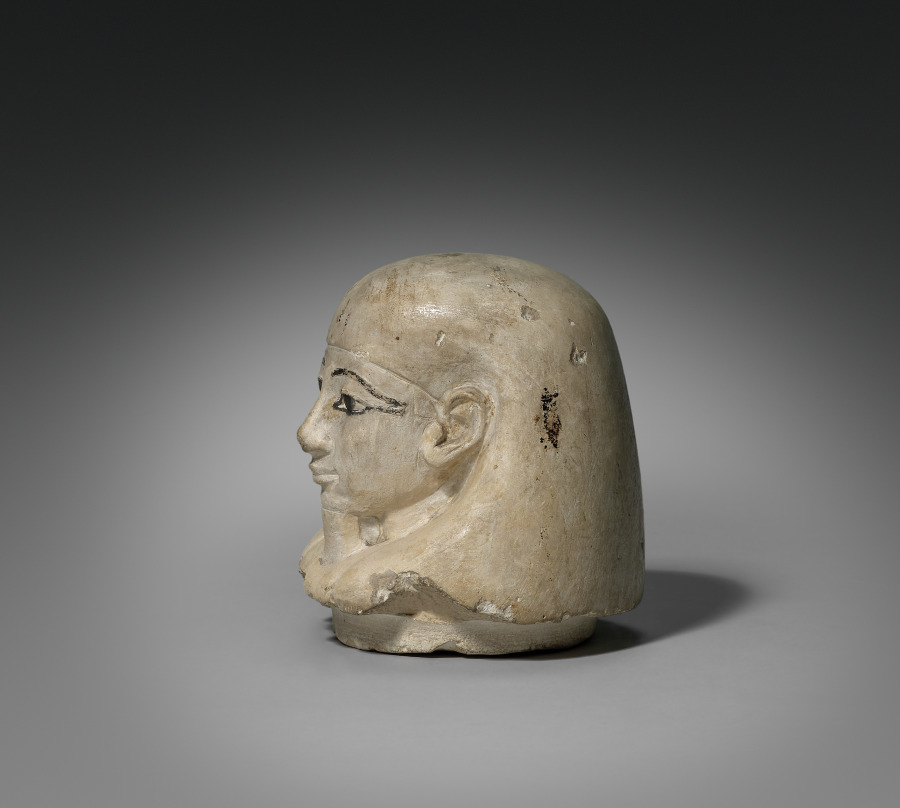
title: Canopic Jar with Lid (lid)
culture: Egypt, New Kingdom (1540–1069 BCE), Dynasty 18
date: 1540–1296 BCE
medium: limestone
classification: Funerary Equipment